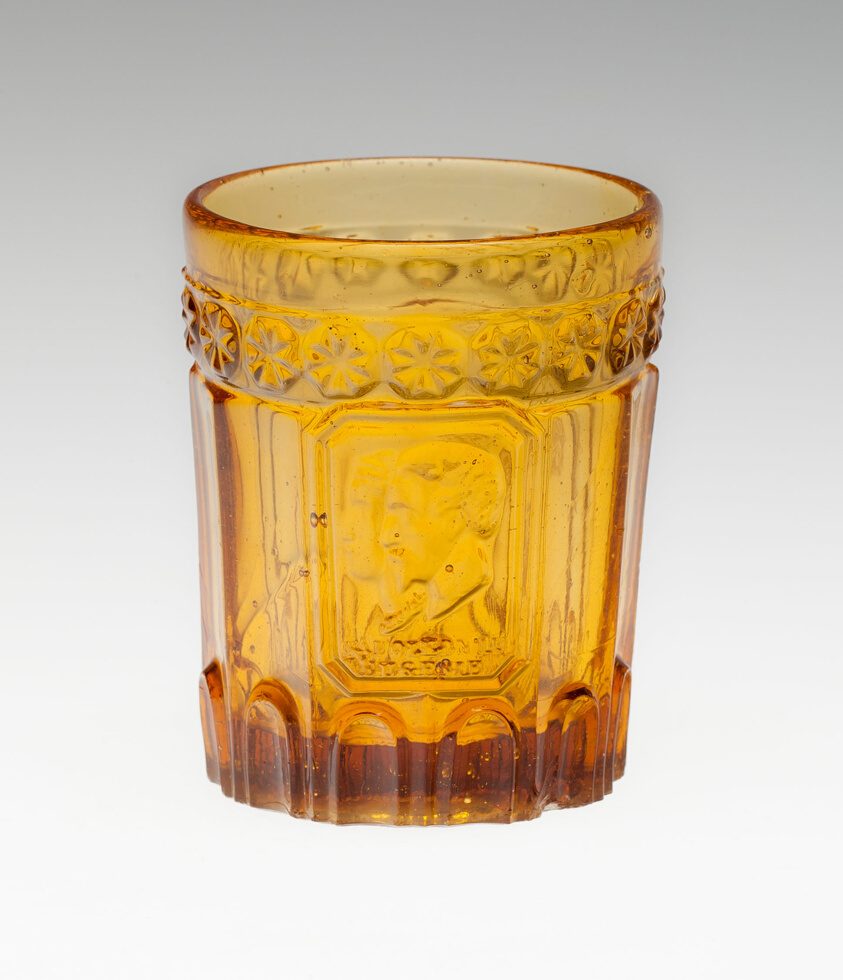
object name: Glass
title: Memorial Glass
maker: France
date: c. 1851/65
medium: Glass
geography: France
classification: drinking vessel; glass; european decorative arts